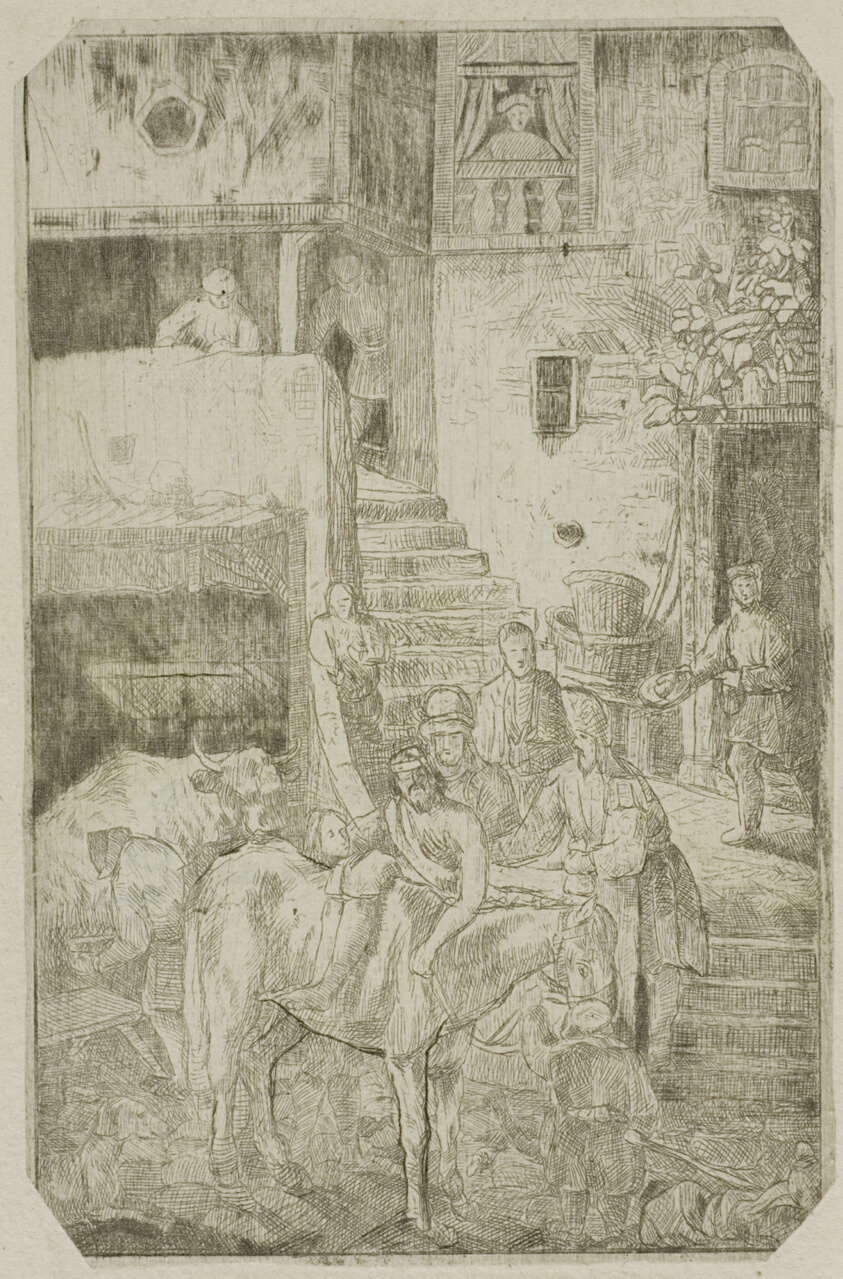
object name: Print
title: The Good Samaritan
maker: Rodolphe Bresdin (French, 1825-1885)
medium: Etching on ivory chine, mounted on cream laid paper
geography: France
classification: etching; print; prints and drawing